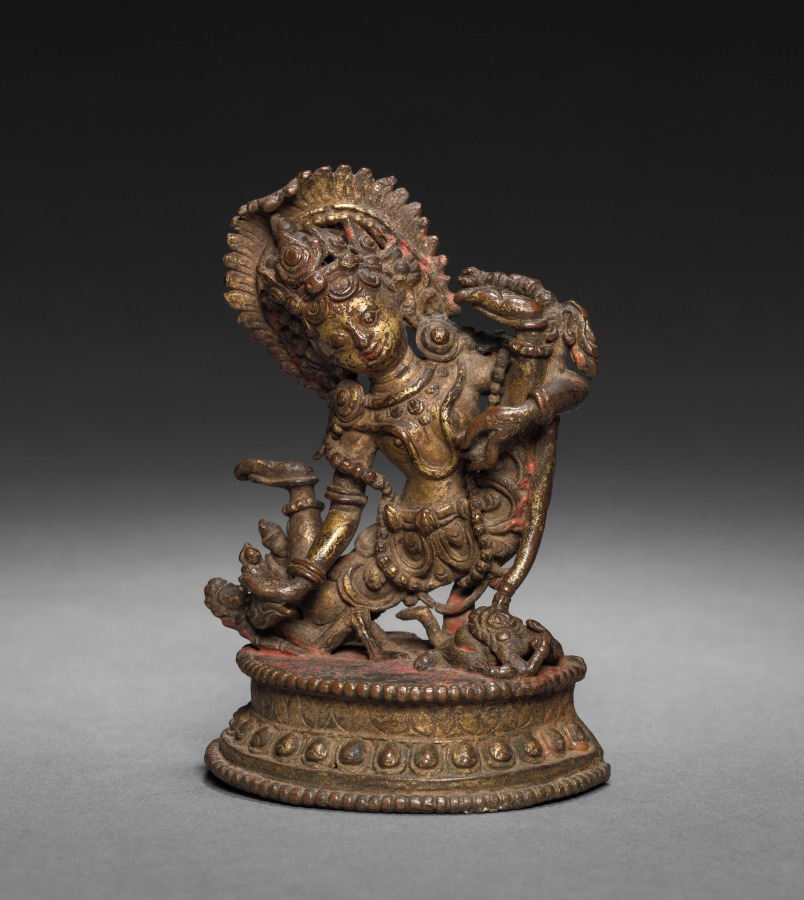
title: Achala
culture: Nepal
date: 1500s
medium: brass or bronze; turquoise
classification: Sculpture